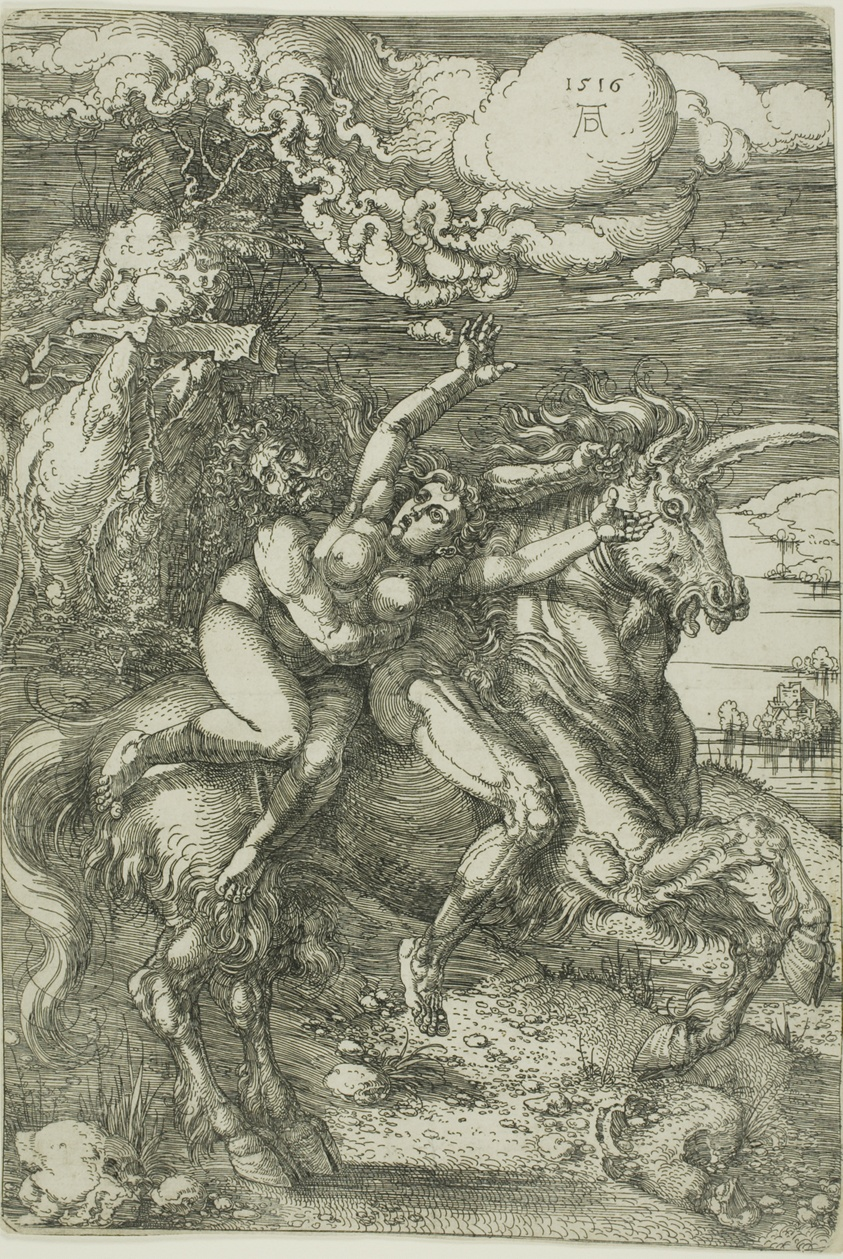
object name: Print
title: The Abduction of Proserpine on a Unicorn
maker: Albrecht Dürer (German, 1471-1528)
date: 1516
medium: Etching in black on off-white laid paper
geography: Germany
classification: etching; print; prints and drawing; paper